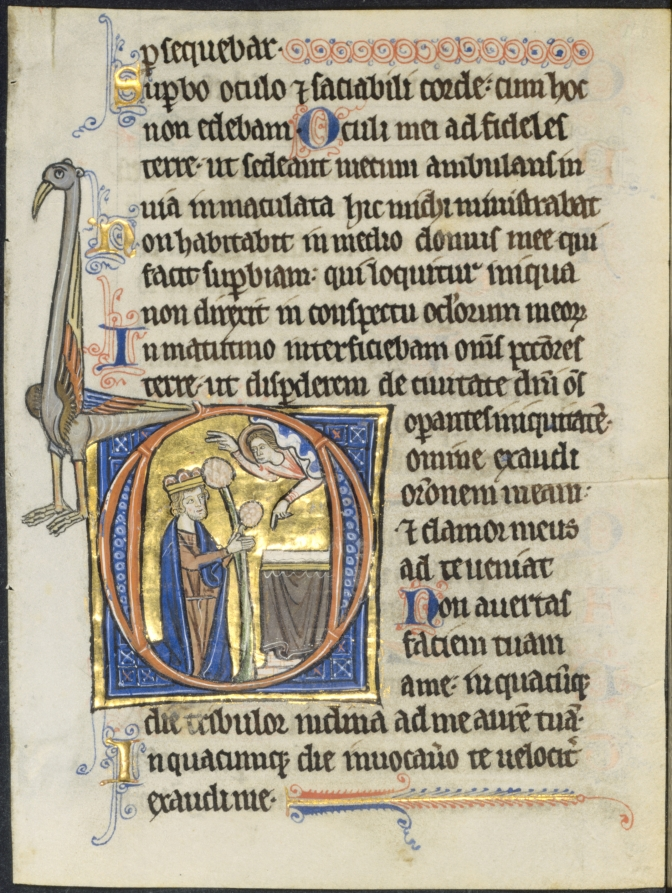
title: Leaf from a Psalter: Initial D: David in Prayer before an Altar and Christ in a Cloud (2 of 2 Excised Leaves)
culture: England, Oxford (?), 13th century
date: c. 1270–1280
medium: ink, tempera and gold on vellum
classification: Manuscript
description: An impressive eight-line initial represents a kneeling David praying before an altar amid stylized topiaries and set against a burnished gold ground. The text introduces Psalm 101: Domine exaudi orationem meam (Hear my prayer, O Lord, and let my crying come unto thee). Facial types for the figures are rather coarse, with hard lines and sharp expressions and very schematic drawing of the hair and poses are rigid and angular. Hard drapery patterns emphasize the triangular folds and the marginal outgrowth of the initial D terminates as a standing bird. Stylistically, these leaves relate to English work of about 1275–1300, possibly from the vicinity of Oxford.